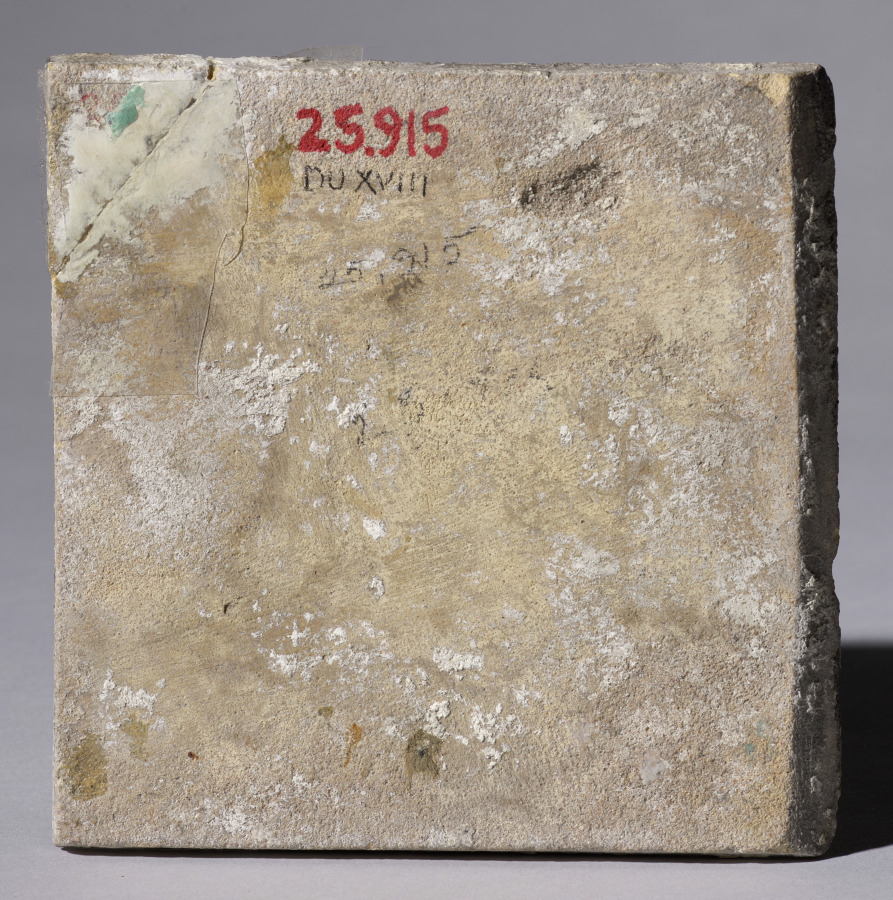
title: Tile- Floral Design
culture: Netherlands, Holland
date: 1700s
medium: glazed ceramic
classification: Ceramic